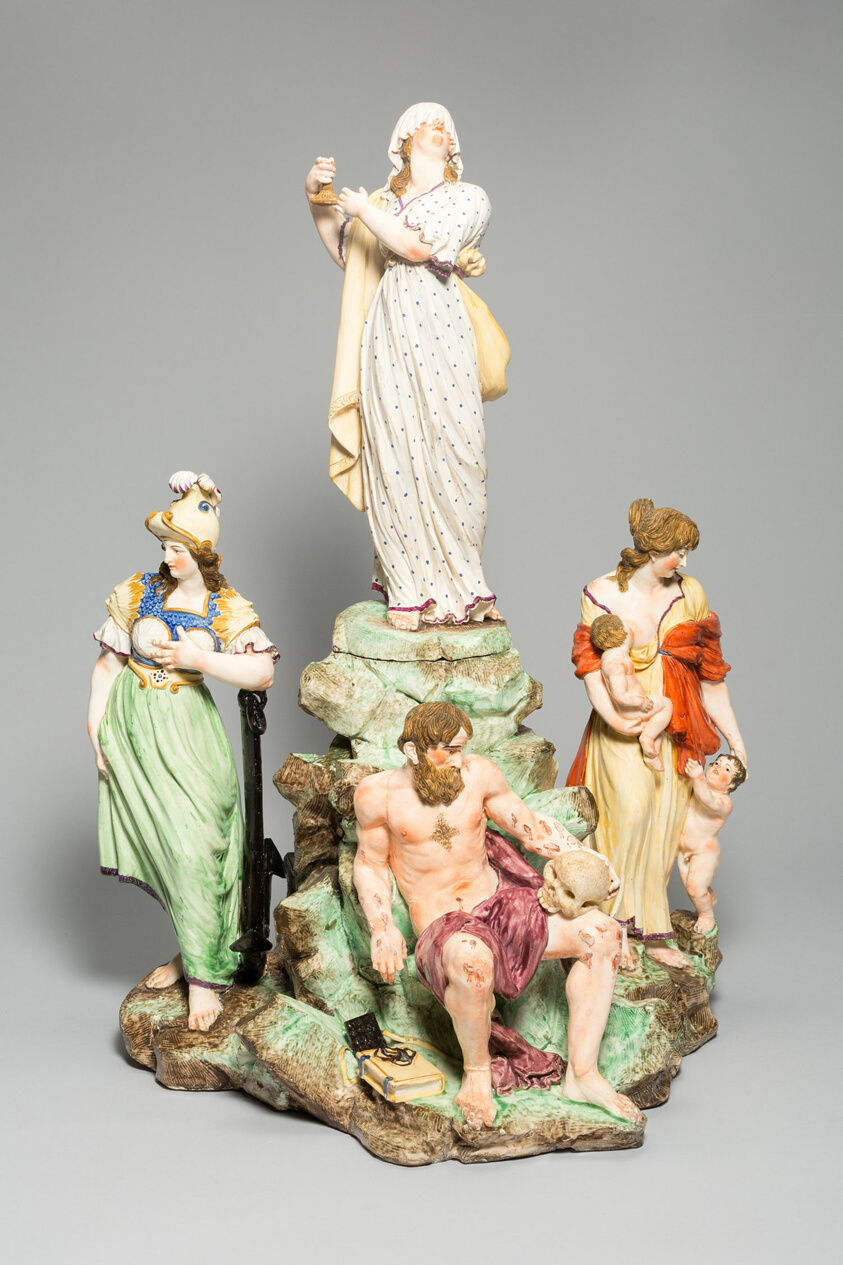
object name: Ceramics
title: Allegorical Figure Group: The Virtues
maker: Buen Retiro Porcelain Factory (Spanish, 1759-1808)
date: 18th century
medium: Porcelain with polychrome decoration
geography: Buen Retiro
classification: sculpture; ceramics; porcelain; european decorative arts